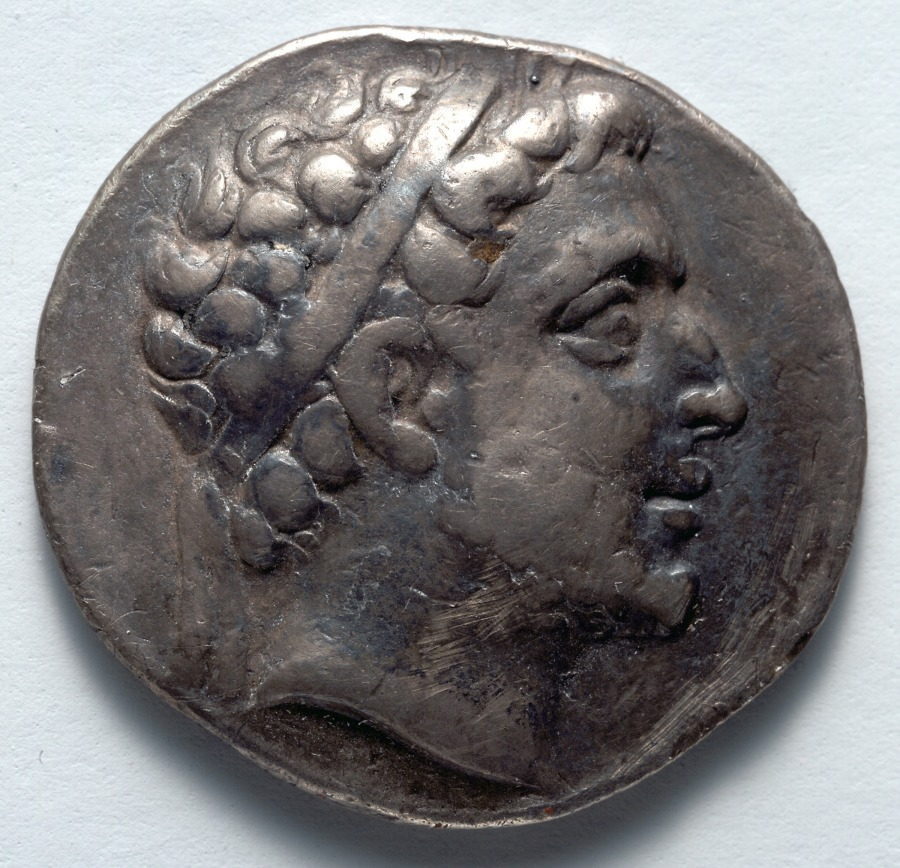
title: Didrachm: Head of Philip V (obverse); Club (reverse)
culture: Greek, Macedonian, minted in Macedonia, reign of Philip V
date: 220–179 BCE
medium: silver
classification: Coins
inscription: ΒΑΣΙΛΕΩΣ | ΦΙΛΙΠΠΟΥ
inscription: ΔΙ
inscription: Ι within Σ